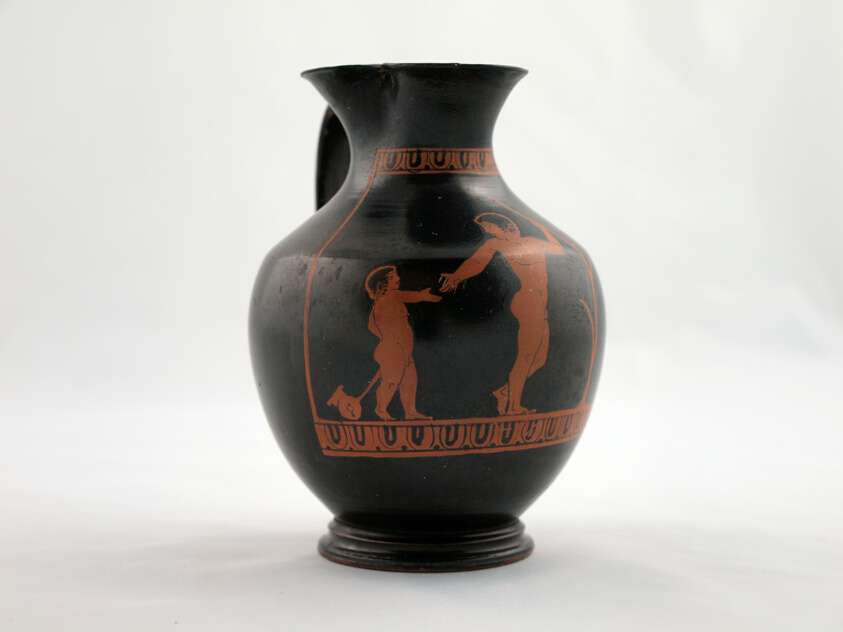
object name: Vessel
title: Chous (Toy Pitcher)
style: high classical, Classical, attic, red-figure, ancient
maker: Greek; Athens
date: 440-420 BCE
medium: Terracotta, red-figure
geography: Athens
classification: vessel; ancient art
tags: children